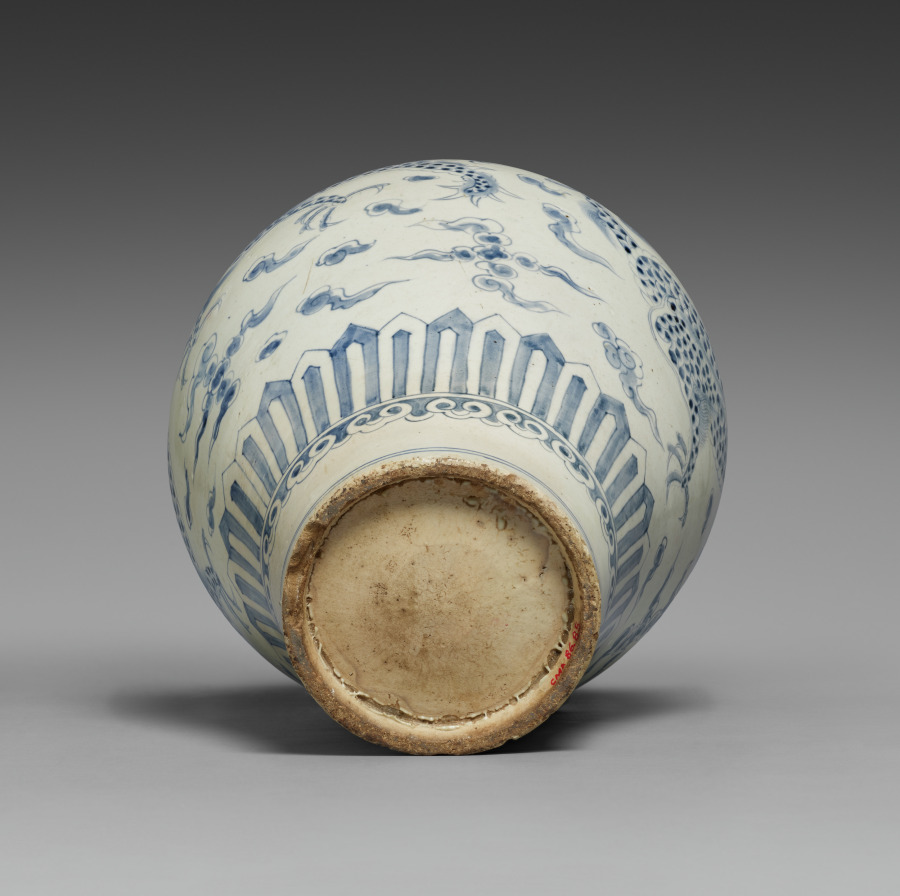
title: Jar with Dragon Design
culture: Korea, Joseon dynasty (1392–1910)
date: 1700s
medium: porcelain with underglaze blue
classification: Ceramic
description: As a mythical creature believed to make rain, the dragon served as a symbol of rulers in premodern East Asia. Here, a cobalt blue dragon is depicted flying through clouds to catch a flaming, wish-granting jewel called a cintamani. In the royal court, the shorter type of dragon jar held wine, while the tall type, like this one, held flowers. This porcelain once belonged to Robert W. Moore, who developed an interest in Korean art while serving in the US Army in South Korea during the 1950s and 1960s. Later, the CMA acquired this important work through an auction sale in 1986.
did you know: A mythical creature believed to have the power to make rain, the dragon is a prominent symbol of rulers in premodern East Asia; the image of dragons was used exclusively for the king's paraphernalia.